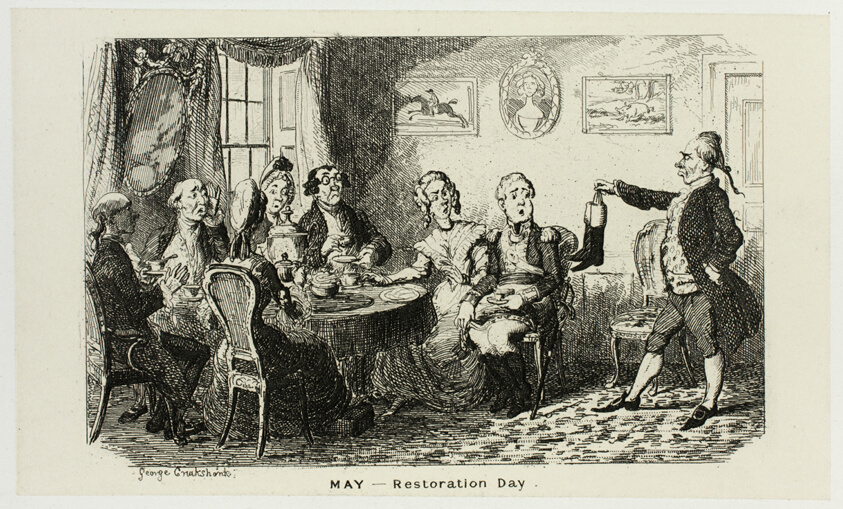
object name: Print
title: May - Restoration Day from George Cruikshank's Steel Etchings to The Comic Almanacks: 1835-1853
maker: George Cruikshank (English, 1792-1878); published by Pickering & Chatto (English, 19th century)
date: 1839, printed c. 1880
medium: Steel etching in black on cream India paper, laid down on off-white card (chine collé)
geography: England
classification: etching; paper; steel; print; prints and drawing